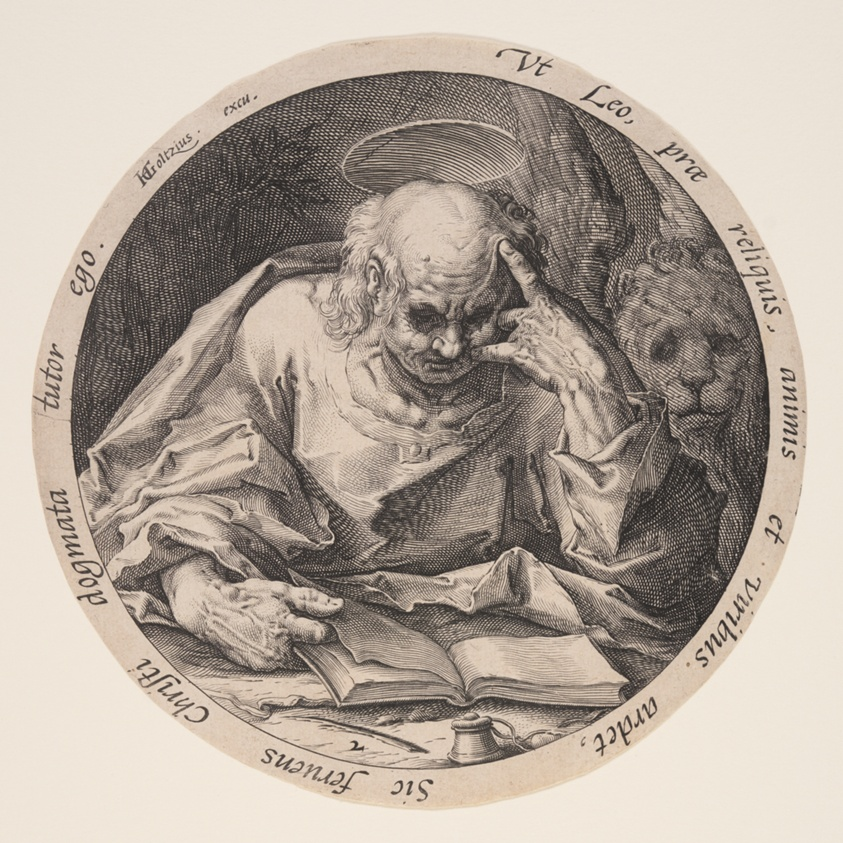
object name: Print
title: Mark, from The Evangelists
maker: Jacques de Gheyn II (Dutch, 1565–1629); after Hendrick Goltzius (Dutch, 1558–1617)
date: 1588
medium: Engraving on laid paper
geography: Netherlands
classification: engraving; paper; print; prints and drawing